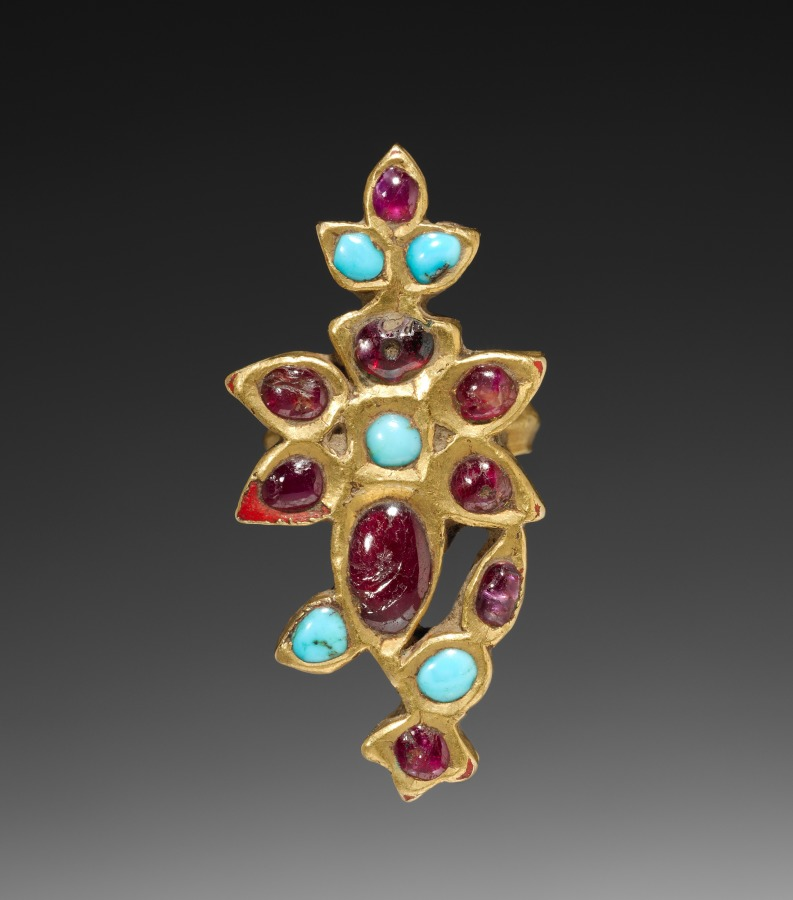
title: Ring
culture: Burma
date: 1800s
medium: gold, turquoise and rubies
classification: Jewelry